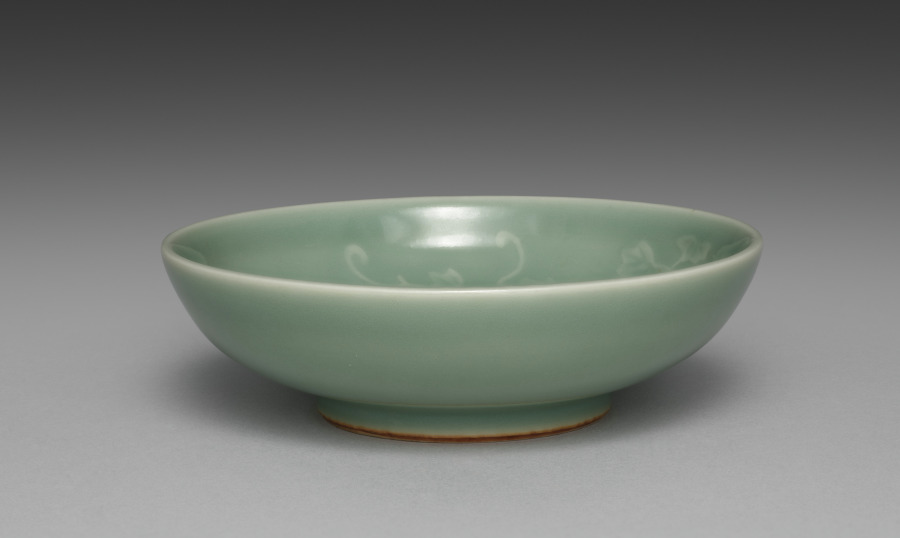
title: Dish from Dishes with Ivy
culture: Japan, Meiji period (1868–1912)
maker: Seifū Yohei III (Japanese, 1851–1914)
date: 1893–1914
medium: One from a set of five dishes; porcelain with green glaze and molded designs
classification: Ceramic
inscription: 清風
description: Yohei III’s main output for his sophisticated clientele was in the form of tea sets and dining sets. He often produced in pairs, sets of five, or sets of ten. This set of five dishes with a green glaze and designs of ivy vines in very low relief has unfortunately lost its box. These dishes are slightly larger than the other dishes, like CMA 2022.187, and so may have been not saucers but rather small plates for meals.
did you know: In his career, Seifū Yohei III created a range of dishes in green glazes.